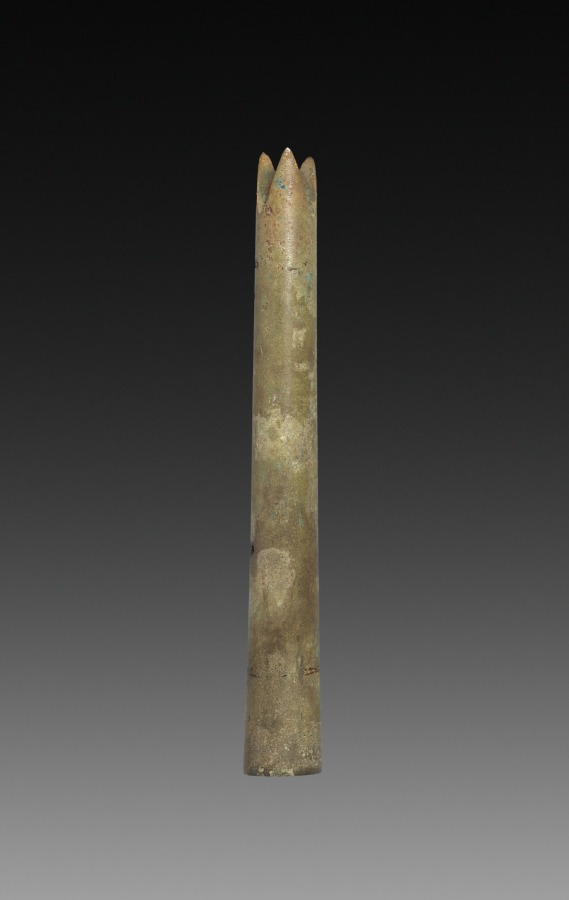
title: Spear with Three Points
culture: China, Zhou dynasty (c. 1046–256 BCE)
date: 1045–256 BCE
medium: bronze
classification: Arms and Armor